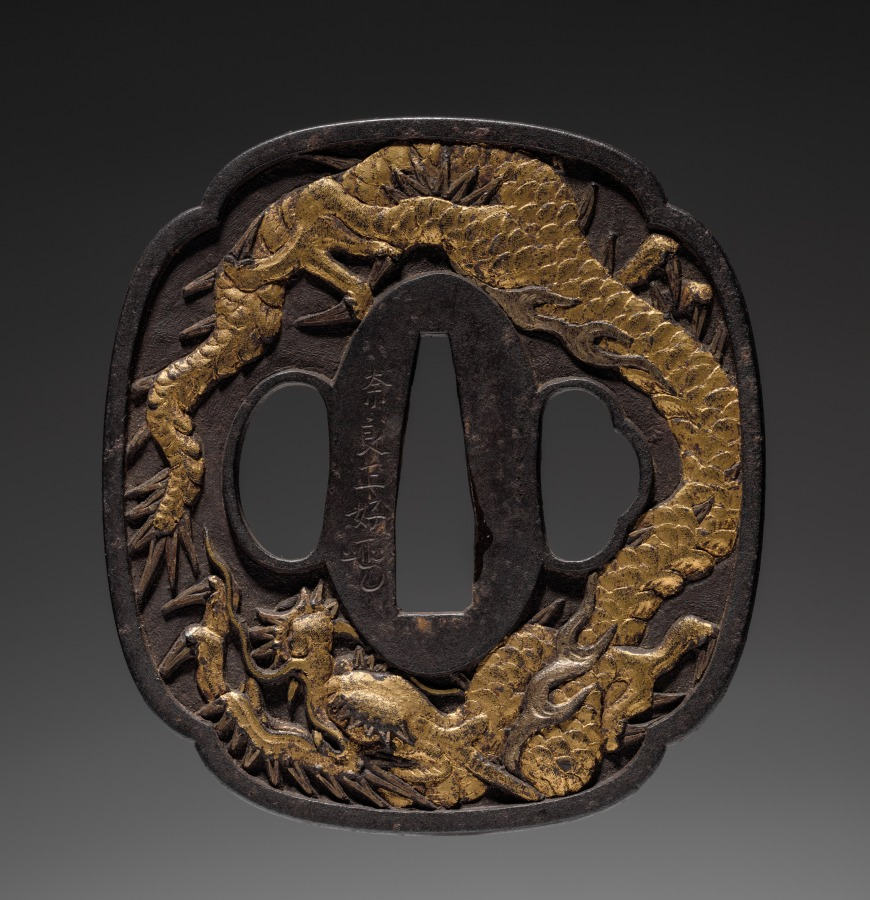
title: Sword Guard (Tsuba) with Dragon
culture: Japan, Edo period (1615–1868)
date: mid-1800s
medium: iron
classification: Arms and Armor